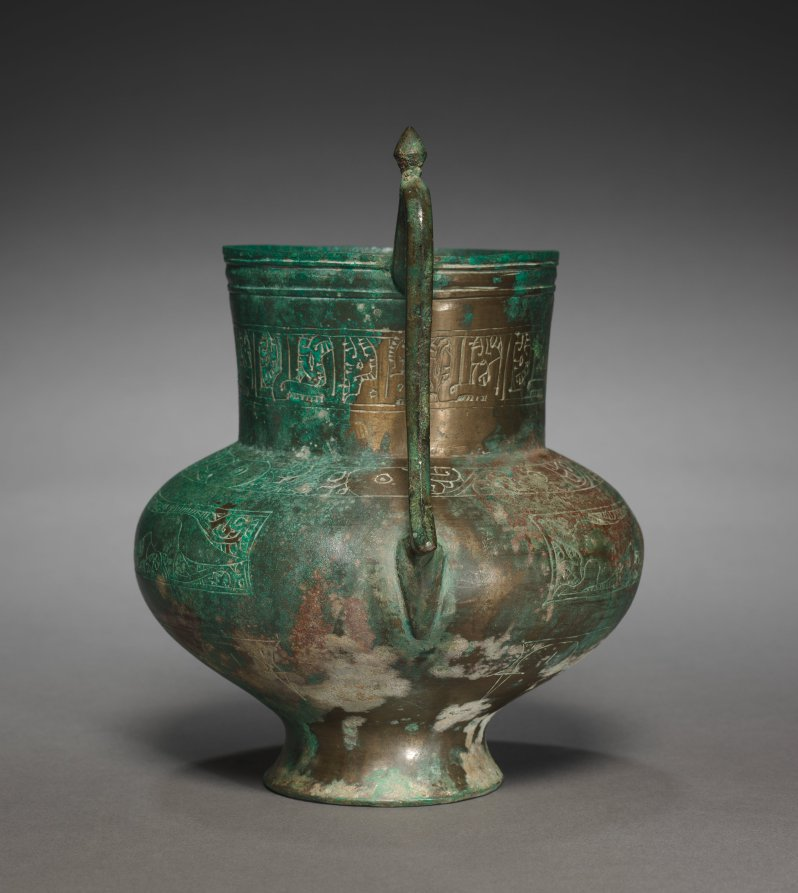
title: Jug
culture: Iran, Khurasan, Nishapur, Seljuk Period, 12th century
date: 1100s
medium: cast brass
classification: Metalwork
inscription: Kufic inscription, undeciphered